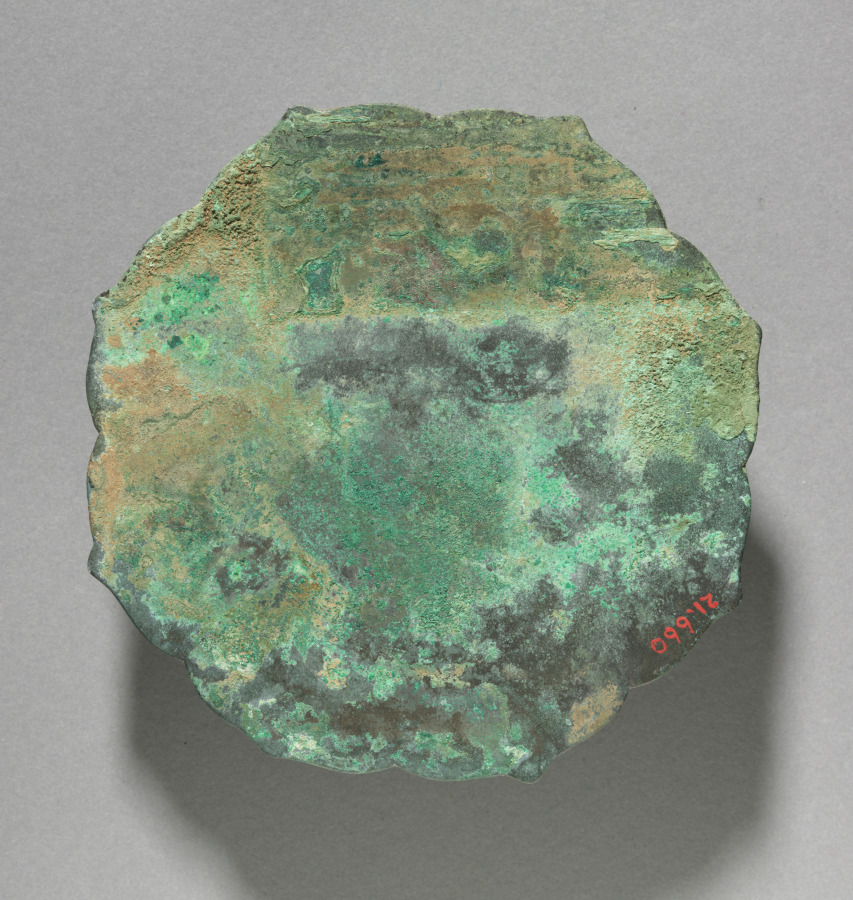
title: Eight-foiled Mirror with Flower and Phoenix Design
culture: Korea, Goryeo dynasty (918–1392)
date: 1100s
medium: bronze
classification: Metalwork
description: From ancient times, a mirror assumed various roles; a ritualistic tool, a diplomatic gift, and a luxury commodity. During the Goryeo dynasty (918-1392), which saw the great advancement of metallurgy, the royal court was the center of distributing sophisticated bronze artifacts. According to historical records, on the 7th day of the Lunar New Year, the king bestowed a bronze mirror inscribed with auspicious symbols upon each court official as part of a ceremony to celebrate the Day of Humans. This explains why a large quantity of bronze mirrors were excavated from elite tombs.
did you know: Due to its origin as an important tool in religion and politics, mirrors are often mentioned in many Korean proverbs that warn certain behaviors.